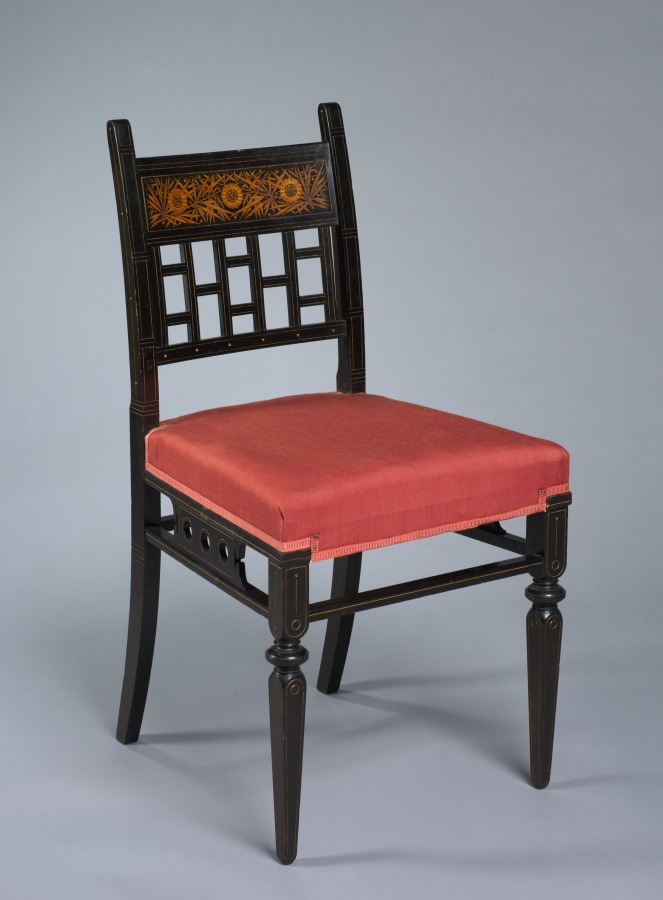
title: Chair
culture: America, New York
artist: Herter Brothers (American)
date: c. 1880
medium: ebonized cherry and other woods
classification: Furniture and woodwork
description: In the 1870s, the furniture made by the Herter firm was influenced by Japanese style, as seen in the marquetry at the top of this chair. It closely resembles one that was supplied for use in the Red Room of the White House in the redecoration of 1882–83.